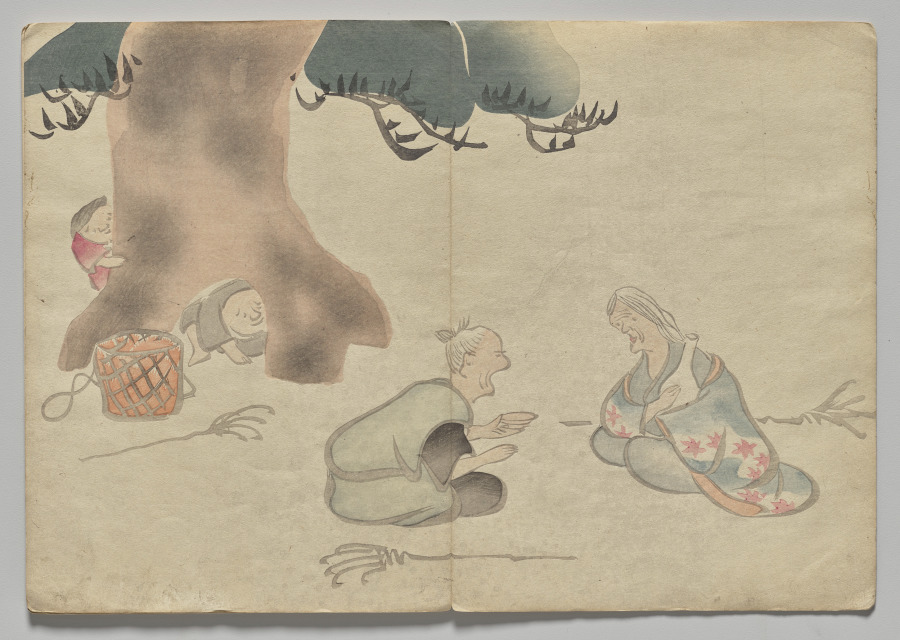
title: Scene from The Kōrin Picture Book (Volume 1)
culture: Japan, Edo period (1615–1868)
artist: Nakamura Hōchū (Japanese, d. 1819)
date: 1800s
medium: color woodblock printed book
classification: Bound Volume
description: Ogata Korin (1658-1716) was one of the most admired artists of Rimpa, or "decorative school painting." These books by the charming later-generation Rimpa artist Hochu record Korin's inventive designs.